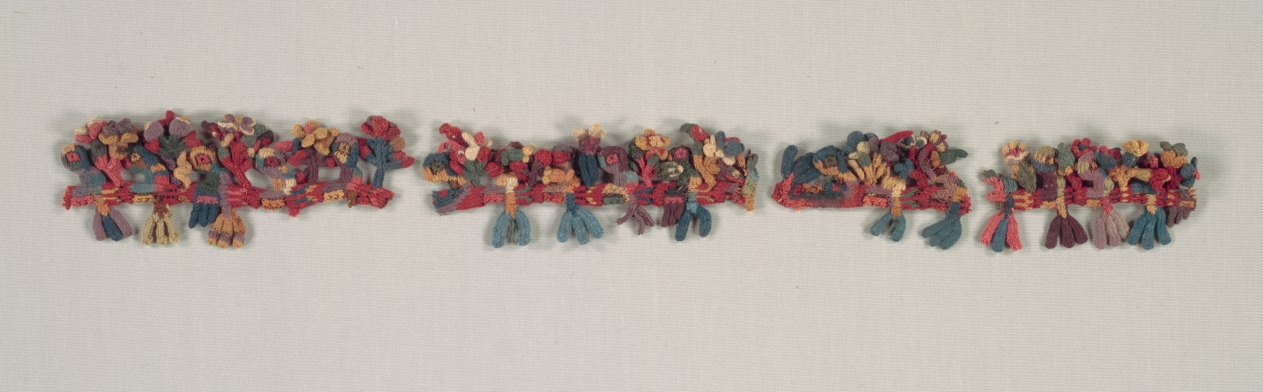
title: Border Fragment with Birds and Flowers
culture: Peru, South Coast, Nasca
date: 100 BCE–700 CE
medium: embroidery of polychrome wools on cotton foundation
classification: Embroidery